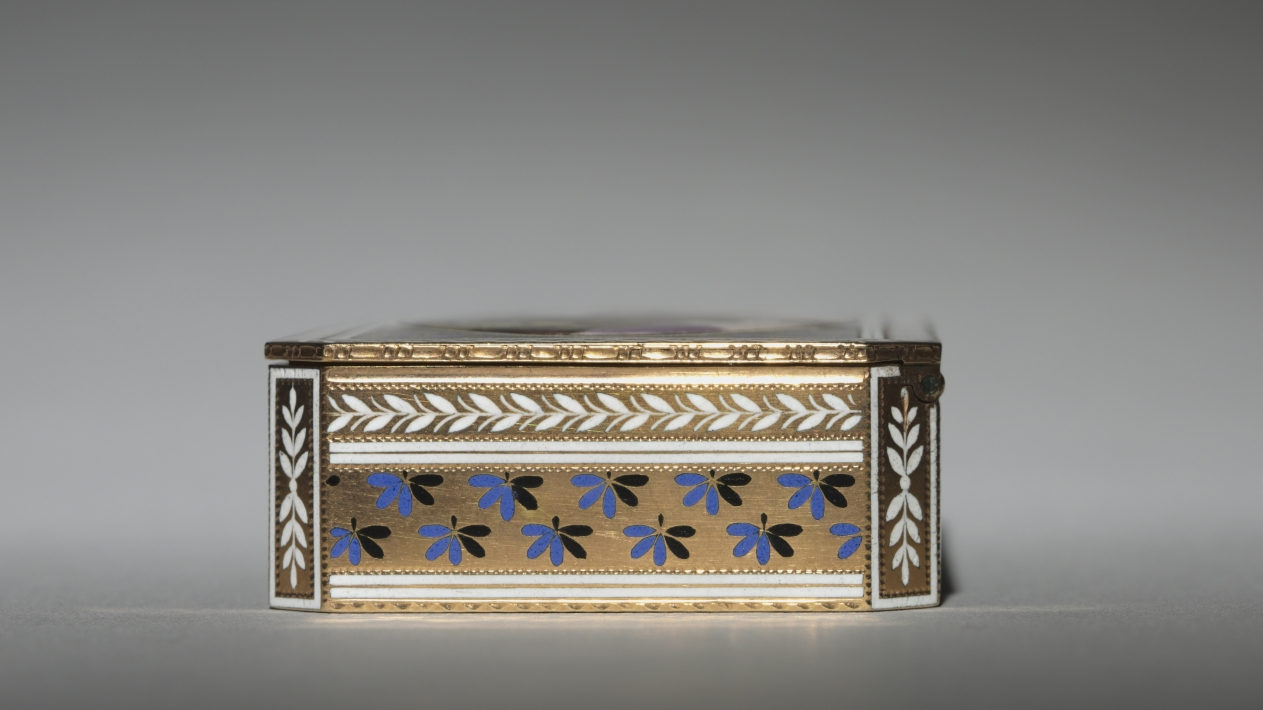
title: Box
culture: Switzerland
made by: probably by F. Joanin (Swiss)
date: c. 1810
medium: gold and enamel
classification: Miscellaneous